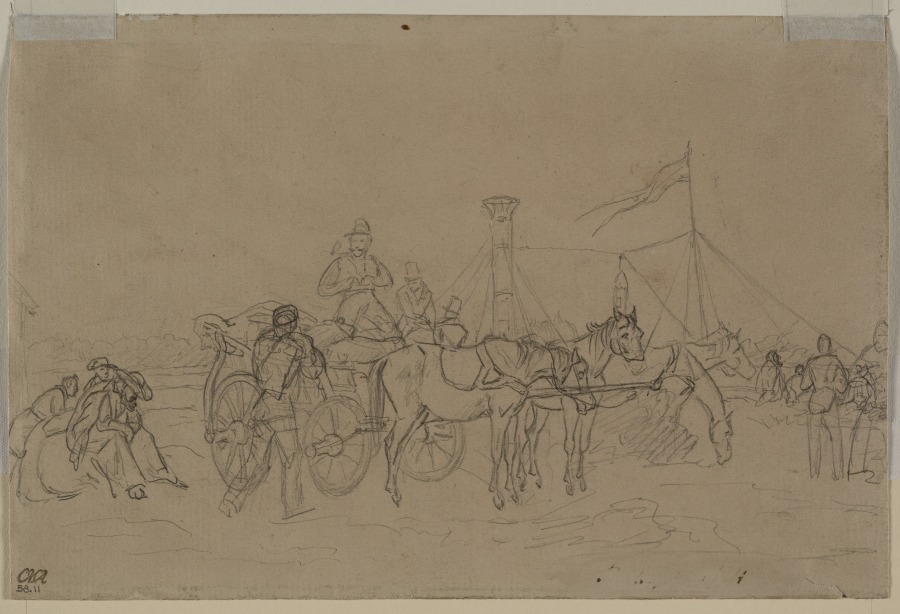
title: Passengers for Rhine Steamer (verso)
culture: Germany, 19th century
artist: Heinrich von Mayr (German, 1806–1871)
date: second or third quarter 1800s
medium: graphite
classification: Drawing